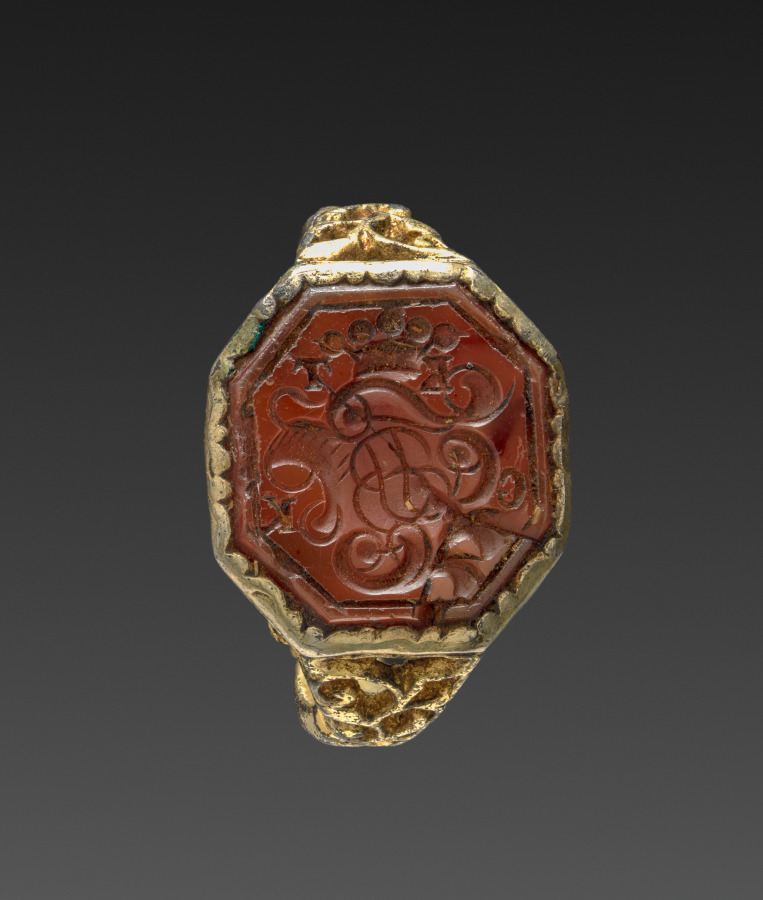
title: Seal Ring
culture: Germany, 18th century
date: 1700s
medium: gilded metal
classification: Jewelry